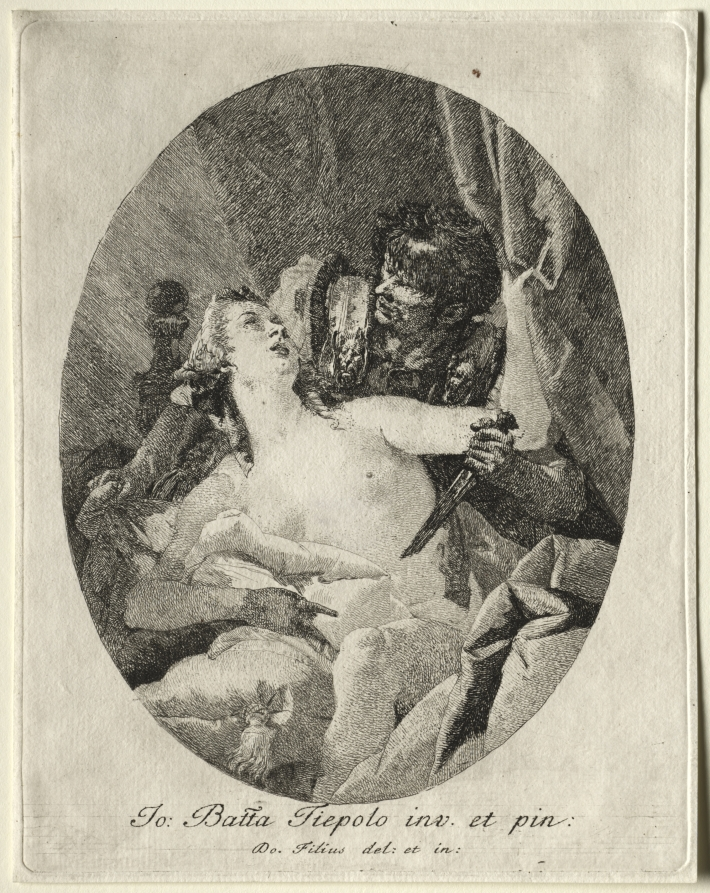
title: Tarquin and Lucretia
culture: Italy, 18th century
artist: Giovanni Domenico Tiepolo (Italian, 1727–1804)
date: late 1700s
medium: etching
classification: Print